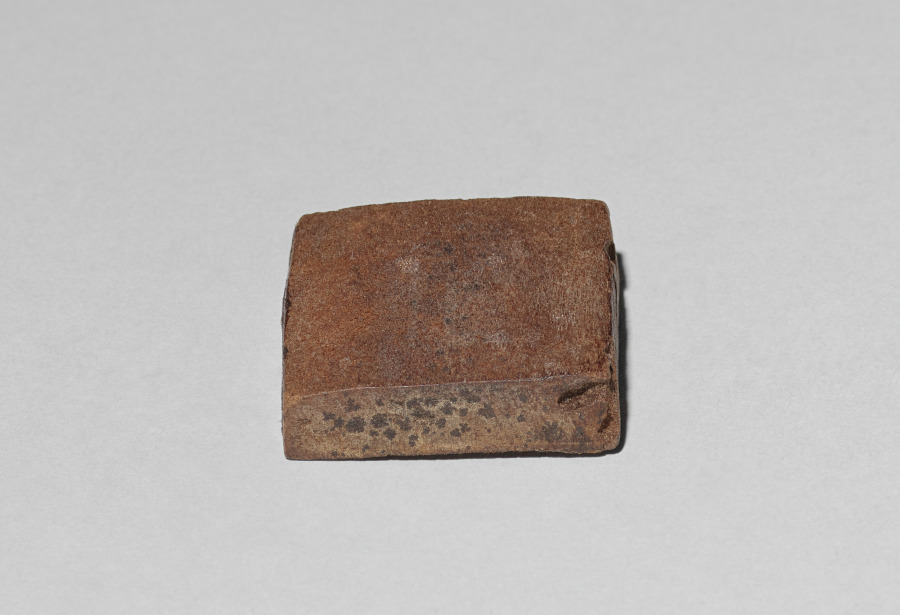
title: plug for the bottom of Container in the form of a Sacrificer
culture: Peru, Middle Horizon, Wari Culture, 7th -11th century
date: 770–890 (radiocarbon date, 95% probability)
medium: wood and red pigment (cinnabar)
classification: Wood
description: This plug is on the bottom of a container that assumes the shape of a magnificent, feline-headed, supernatural sacrificer who draws a knife across the throat of the human it holds in its lap. Severed human heads hang from the feline's belt and dangle by the trachea at the back of its headdress. Sacrifice had a place in Wari religious practice, probably as an unusual and exceptionally precious offering made to entice the benevolence of cosmic forces. Indeed, colonial-period Andean people believed that death was a prerequisite for the renewal of the world.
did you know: Traces of cinnabar, a toxic mercuric sulfide, are visible on the container's surface.